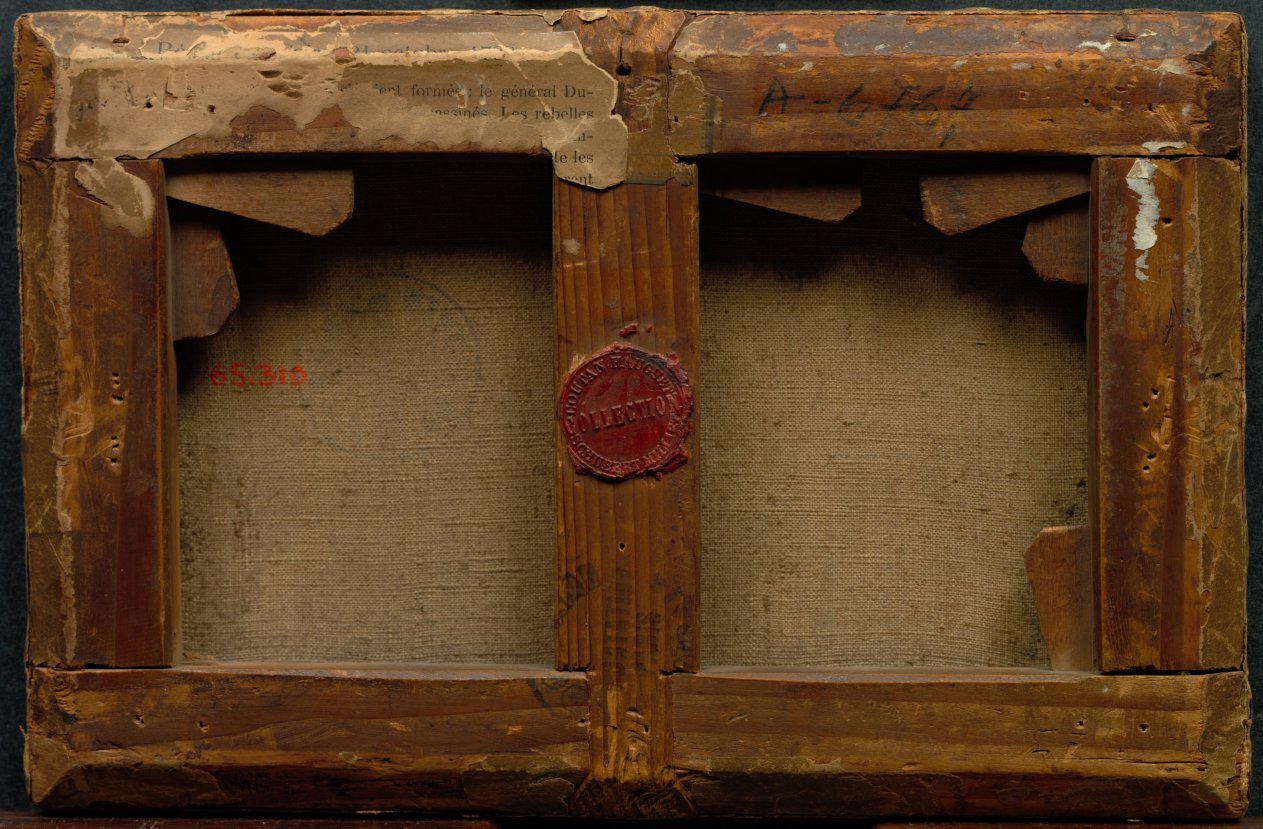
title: Sketch for "The Revolt at Cairo"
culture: France, 19th century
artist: Anne-Louis Girodet de Roucy-Trioson (French, 1767–1824)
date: c. 1809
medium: oil on paper, mounted on paper and canvas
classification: Painting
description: Throughout the 1800s and into the 1900s, prints, paintings, and photographs, like Louis Haghe’s Egypt and Nubia series, brought back by artists who voyaged to Egypt, inspired American and European artists, architects, and designers to emulate ancient Egyptian motifs and styles. Egyptomania blossomed through the 1800s and can be seen in architecture around cities like Washington, DC, and in the interiors of aristocratic homes, as well as in funerary monuments, such as in Lake View Cemetery in Cleveland, Ohio. Looking back at these creations provides an interesting historical groundwork for debating who has the right to interpret Egyptian motifs and styles.